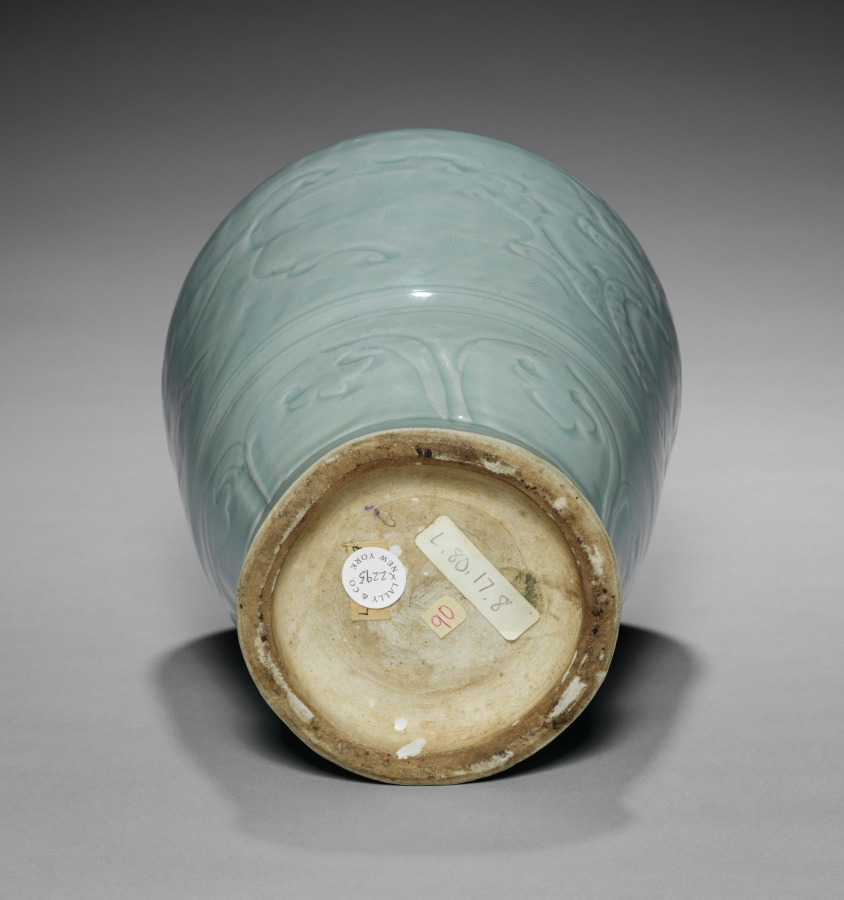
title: Meiping Vase with carved Dragon Motif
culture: South China, Yuan dynasty (1279–1368)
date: 1300s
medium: Porcelain with pale bluish-white (qingbai; 青白) glaze and carved decoration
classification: Ceramic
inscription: There are multiple self-adhesive labels on the bottom: 1. Square white (now yellowed with age) label with "90" written in red ink. 2. White rectangular label with "L.80.17.8" written in pencil. 3. Fabric tape cut to rectangular shape with "L.2161.49 /39" written in black ink. 4. White round label from Lally & Co. New York with "X2295" written in black ink.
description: A fierce coiling dragon chasing a pearl amid mist and clouds—a symbol of fertility and power—decorates this sturdy vase. Its shoulder is incised with a band of lotus flowers and the base features a border of lotus petals. Meiping, literally prunus vase, derives its name from being used to display a single floral spray, traditionally a branch of blossoming plum (or prunus), apricot, or cherry.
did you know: In Chinese mythology, the dragon is believed to transport human souls to the heavens after death.